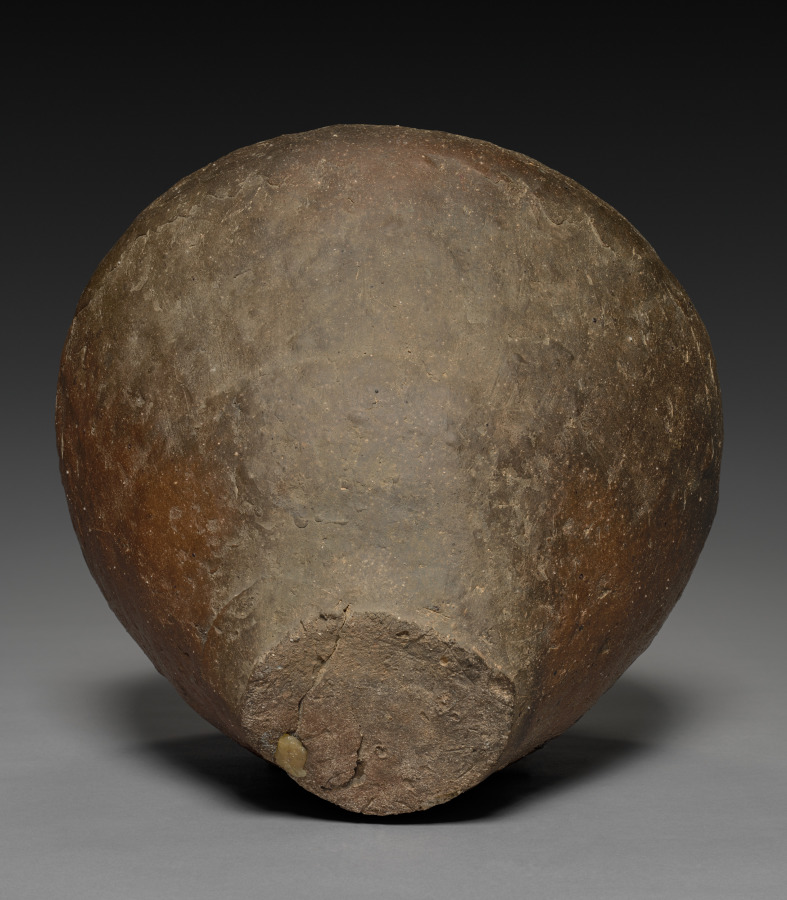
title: Storage Jar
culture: Japan, Kamakura period (1185–1333)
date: late 1100s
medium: Stoneware with natural ash glaze (Tokoname ware)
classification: Ceramic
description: Tokoname, located on Ise Bay in present-day Aichi prefecture on Japan’s main island, Honshu, was the largest center of ceramic production in medieval Japan. It had been an active center of ceramic production since the Heian period (794–1185). Wide-mouthed jars like this one are called kame, and were favored for use in tea practice.